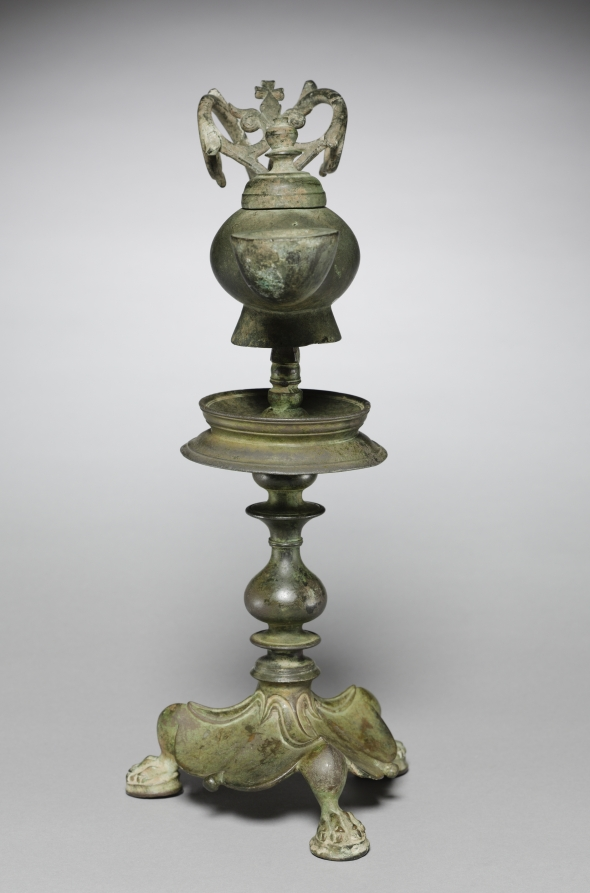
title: Lamp and Stand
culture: Byzantium, early Byzantine period, 5th century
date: 400s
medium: bronze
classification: Metalwork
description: Bronze oil lamps were made either with stands, like the nearby example, or with chains for suspension on hooks within homes and churches. This lamp is cast in the form of a griffin, a guardian figure from antiquity frequently used in Byzantine churches, which contained much wealth. The Christian monogram on the handle indicates the lamp was intended for use within a church.